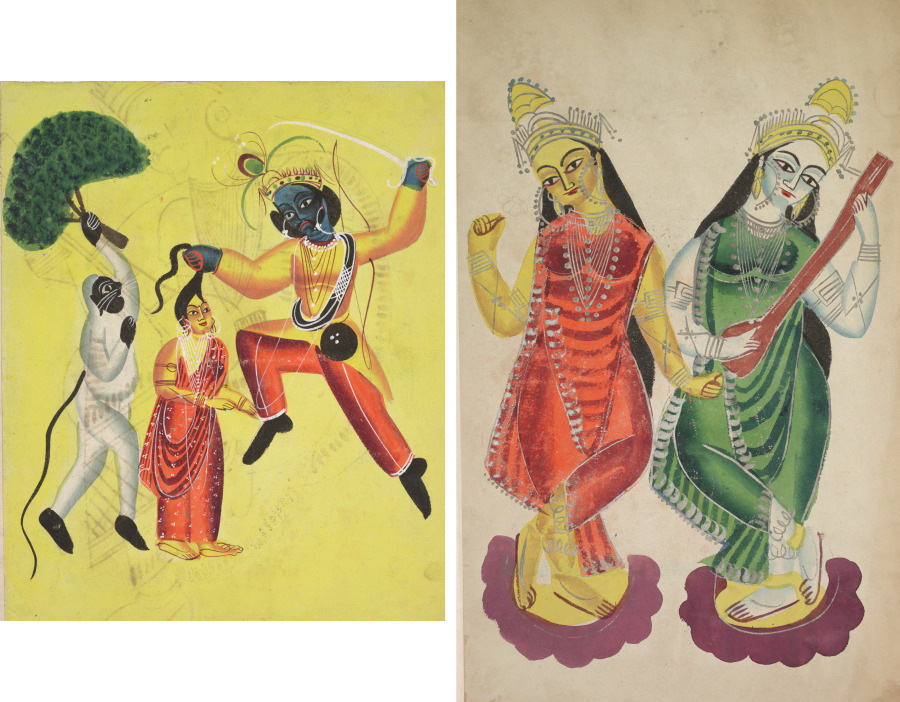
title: Leaf from a Kalighat album: Hanuman attacks Indrajit holding an apparition of Sita by the hair (recto); Goddesses Lakshmi and Sarasvati (verso)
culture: Eastern India, Bengal, Kolkata, Kalighat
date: c. 1890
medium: Gum tempera, graphite, and ink on paper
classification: Painting